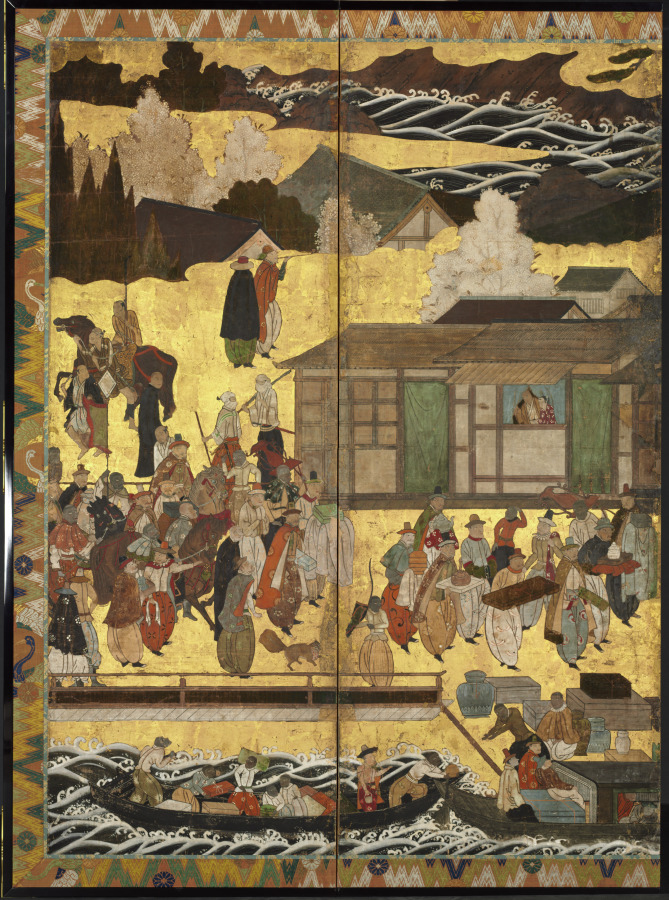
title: Arrival of the "Southern Barbarians"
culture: Japan, Momoyama period (1573–1615)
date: c. 1600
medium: One of a pair of six-panel folding screens; ink, color, and gold on paper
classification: Painting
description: This screen and its corresponding screen show Portuguese merchants arriving in Japan, having crossed the oceans in their large ship with a multinational crew. The Portuguese were known in Japan as the “Southern Barbarians” because they arrived from the south and their customs and manners were unfamiliar to the Japanese, who had not encountered anyone from Europe until their first appearance in 1543. In 1639, the Portuguese were forced out of Japan, mainly owing to internal difficulties caused by their Catholic missionaries, but they were a major conduit for both objects and ideas from Europe for nearly 100 years.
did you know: Europeans were called "Southern Barbarians" because their ships arrived in Japan from the south.